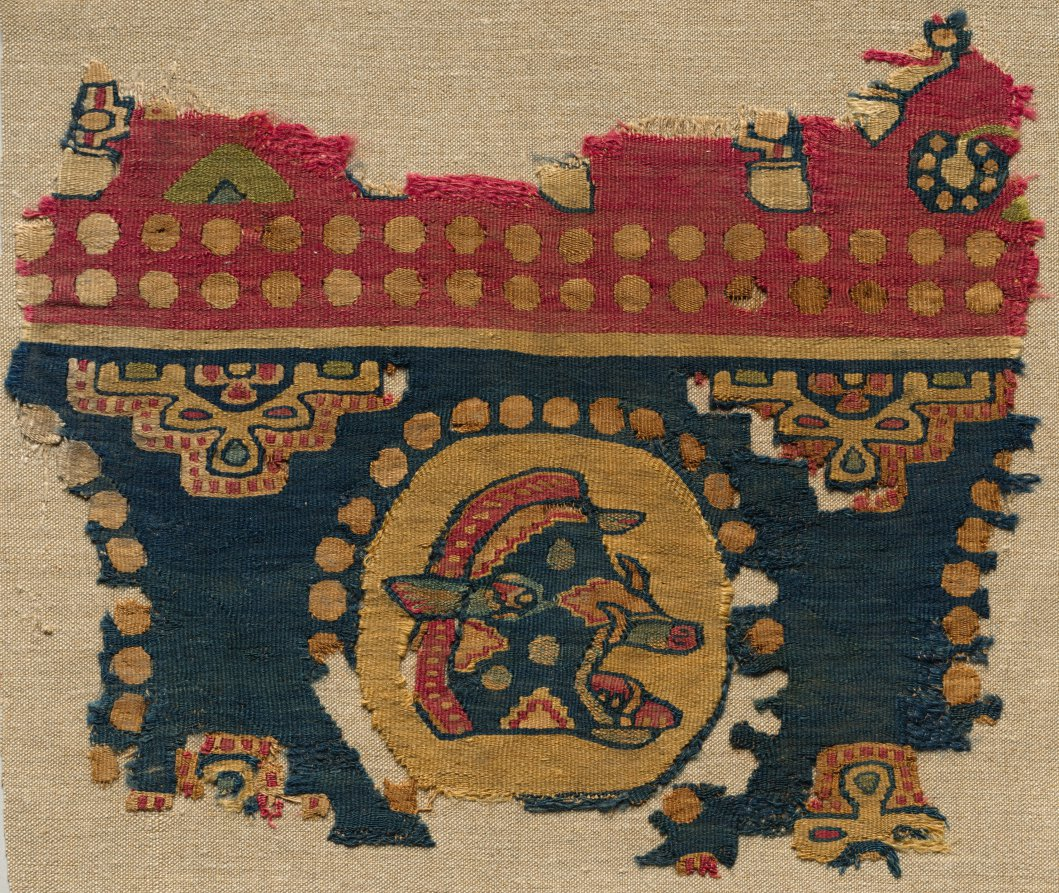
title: Hanging fragment with boar head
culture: Iran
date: 600s–early 700s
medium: Wool and linen: tapestry weave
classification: Textile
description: This fragment preserves parts of two distinct designs. In the lower section, a boar's head is framed by a pearl roundel; to left and right are fragments of two other roundels, and in the spandrels are segments of stylized flowers. In the field above are four feet of what must have been a rather large-scale horse standing in a meadow of flowers of which only fragments remain. A fifth hoof, turned in the opposite direction, indicates that originally the composition included a pair of horses addorsed. A double row of pearls occupies the spaces beneath the horses' feet, and a narrow plain band separates this field from the one below.